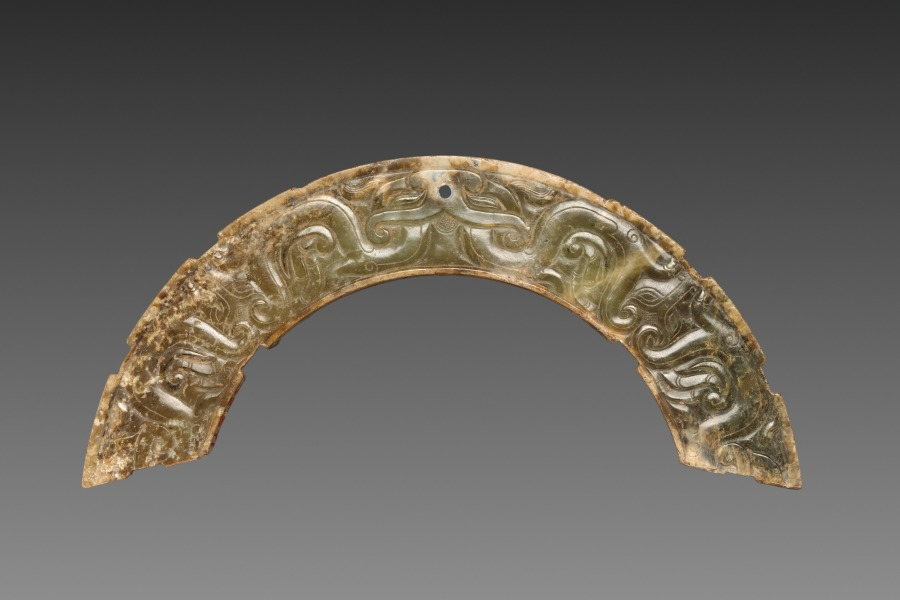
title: Pair of Arc-shaped Pendants with Animal Mask and Interlaced Animal Bands (Huang)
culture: China, Warring States period (475–221 BCE) to Western Han dynasty (206 BCE–8 CE)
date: 300–100 BCE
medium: jade (nephrite)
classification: Jade